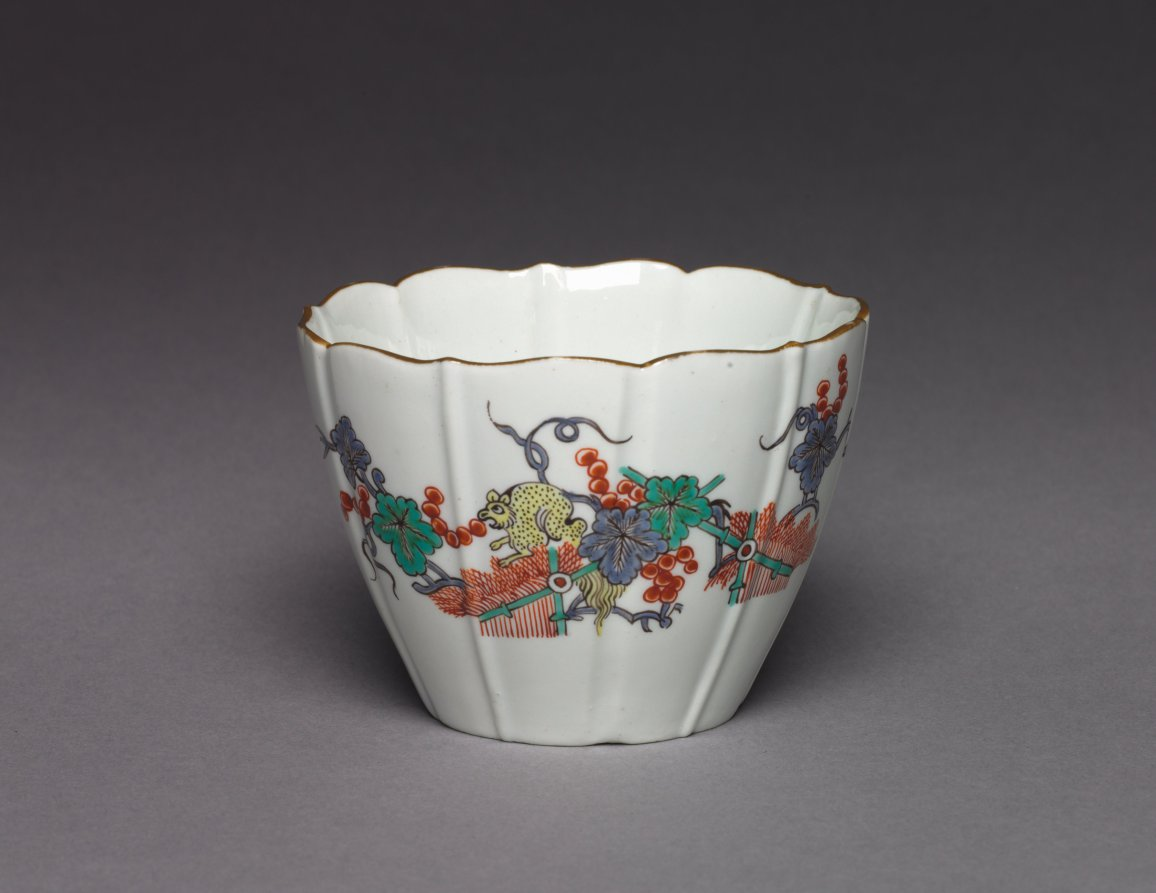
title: Tea Cup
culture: France, Chantilly, 18th century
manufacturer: Chantilly Porcelain Factory (French)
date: c. 1730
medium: soft-paste porcelain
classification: Ceramic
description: The pieces composing this individual tea set are entirely typical of Chantilly soft-paste porcelain in the Kakiemon style. Both the form and decoration of these pieces were inspired by Japanese prototypes. The use of knobs in the form of trumpet-shaped blossoms is characteristic of Chantilly wares.